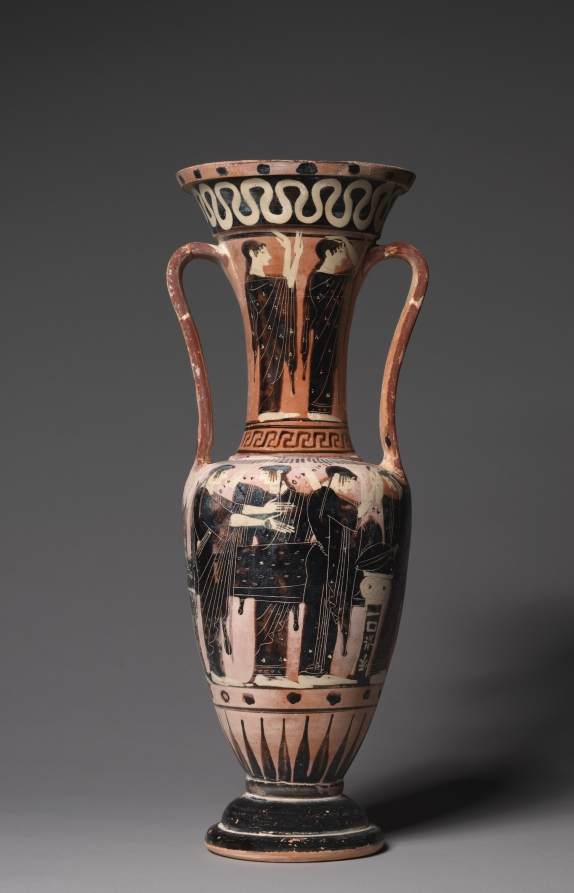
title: Black-Figure Loutrophoros-Amphora (Ritual Water Vessel): Prothesis (Laying out of Corpse), Mourners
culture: Greek, Attic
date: c. 500 BCE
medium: ceramic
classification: Ceramic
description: The loutrophoros, a tall-necked water vessel, served two main purposes in ancient Athens. In life, it carried sacred spring water for ceremonial pre-marriage baths. After death, it marked the tomb of an unmarried person, as if to account for that not experienced in life. Often, as here, it has no bottom, permitting offerings to flow through to the grave. Both the precise shape of this vase—a two-handled loutrophoros-amphora rather than a three-handled loutrophoros-hydria—and its depiction of the deceased suggest the commemoration of a departed man (rather than a woman). The iconography is entirely funerary, with multiple mourning figures shown: four women on the neck; six women surrounding the corpse on its bier; and three men making farewell gestures. The inscriptions near some of the mourning women do not spell out real words but may represent their sorrowful cries.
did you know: Mourning figures wrap all the way around this vessel, even beneath the handles.